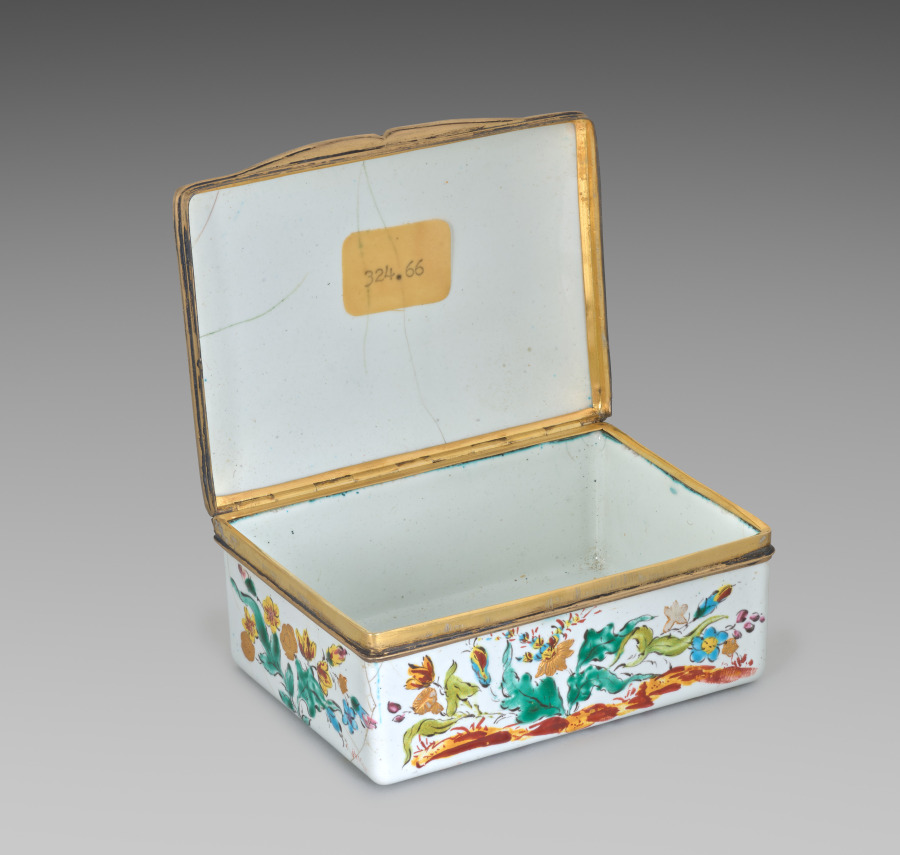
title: Box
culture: France, 18th century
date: 1749–50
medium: silver gilt and enamel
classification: Enamel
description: Chinoiserie in 18th-century France incorporated imitations of East Asian motifs, designs, and ornaments into European art. These imitations were often distorted by the European imagination and were not accurate representations of the cultures from which they drew inspiration. Elements of chinoiserie in this box can be seen primarily on the lid where enormous, vibrantly colored flowers tower over two crouching figures and a grouping of buildings.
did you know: The flower petals on the box lid are raised, an effect produced by drops of transparent enamel placed on the box’s surface that imitates polished gemstones or pearls.